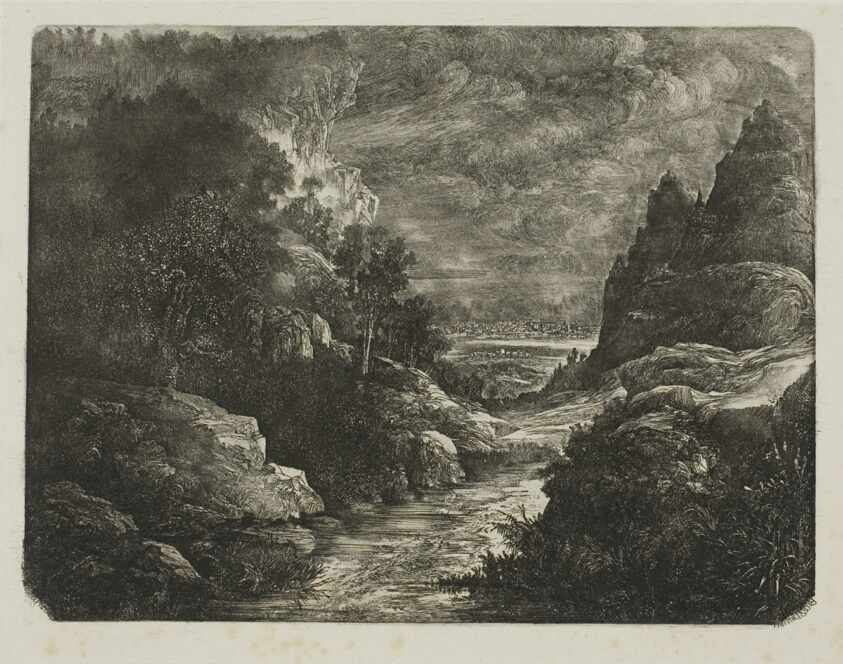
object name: Print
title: The Stream in the Gorge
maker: Rodolphe Bresdin (French, 1825-1885)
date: 1871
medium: Etching on ivory China paper laid down on white wove paper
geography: France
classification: etching; print; prints and drawing